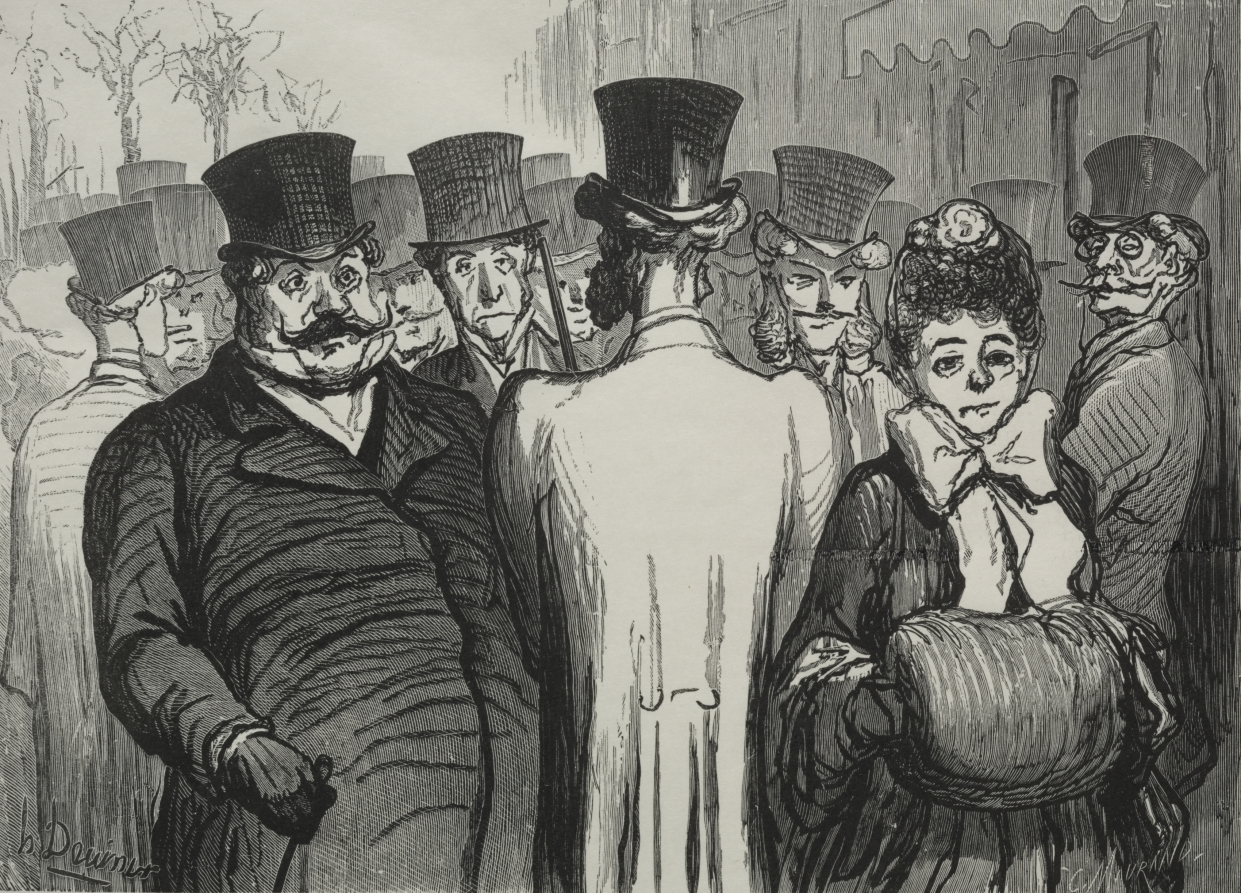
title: The Boulevard des Italiens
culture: France, 19th century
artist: Honoré Daumier (French, 1808–1879)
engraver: Charles Maurand (French, 1824–1904)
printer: François Louis Schmied (Swiss, 1873–1941)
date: 1862, printed 1920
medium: wood engraving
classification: Print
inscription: Lower margin, pencil: 68/75 ; red stamp: FLS